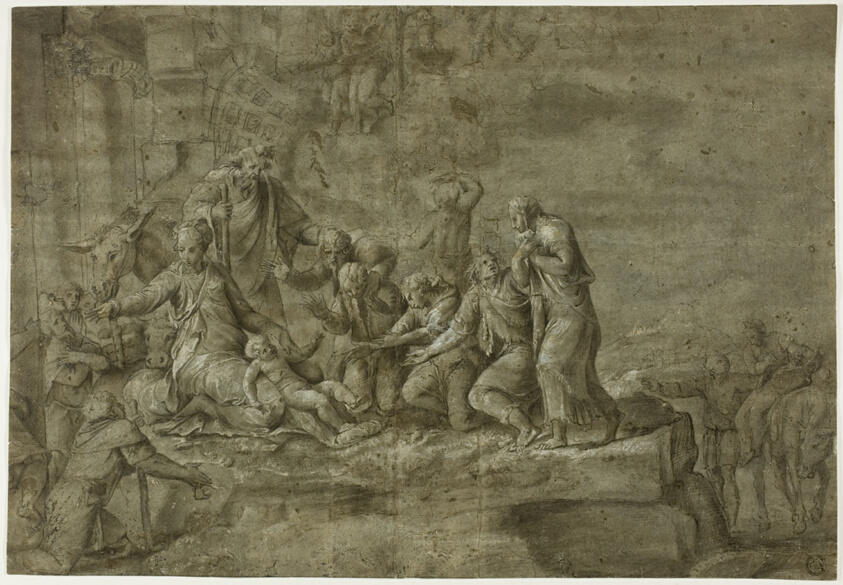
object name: Drawing and Watercolor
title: Adoration of the Shepherds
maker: After Polidoro Caldara, called Polidoro da Caravaggio; Italian, c. 1499-c. 1543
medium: Pen and brown ink, with brush and brown wash, heightened with lead white, on blue laid paper, laid down on ivory laid paper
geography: Italy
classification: ink with wash; drawings (visual works); prints and drawing